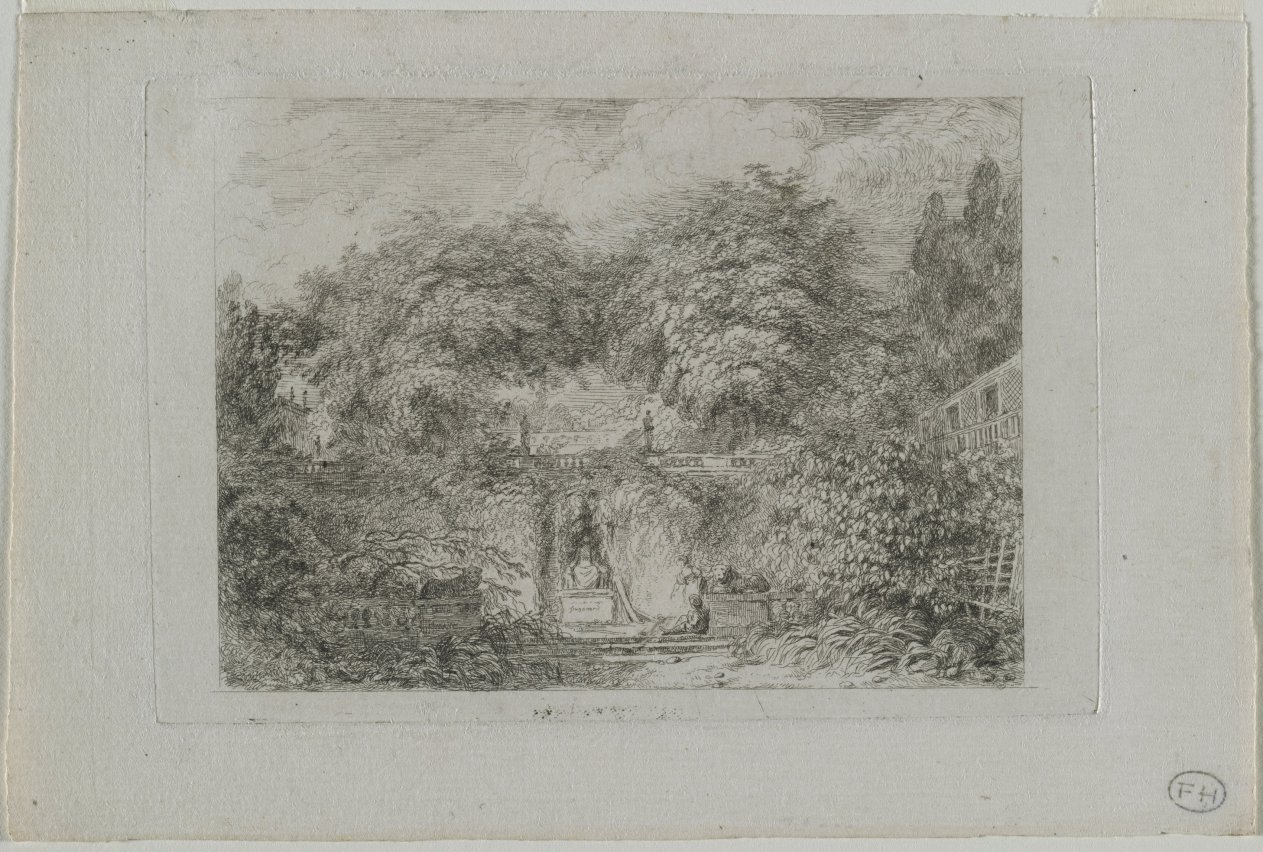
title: The Little Park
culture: France, 18th century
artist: Jean-Honoré Fragonard (French, 1732–1806)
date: c. 1763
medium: etching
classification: Print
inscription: Lower right corner, in black ink: collector's stamp: FH encircled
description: One of Fragonard’s earliest etchings, this picturesque view of an imaginary terraced Italian garden is perhaps inspired by memories of the grounds at the Villa d’Este in Tivoli, where he spent time in 1760. Fragonard’s spontaneously scribbled, willowy lines and his choice of black-gray ink give the etching a silvery quality that evokes the hazy atmosphere of hot Italian summers. Beneath the sun-dappled foliage, between the lion statues, a young woman encounters a youth resting on the steps.